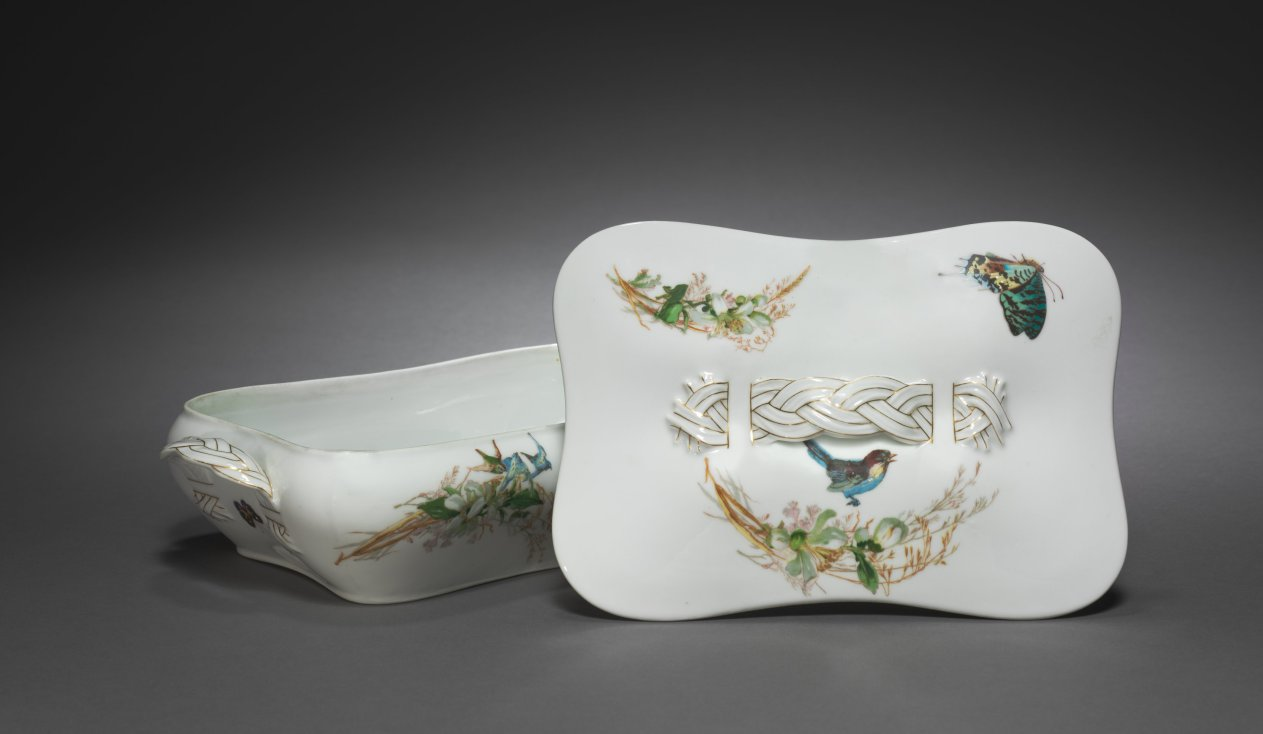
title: Covered Vegetable Bowl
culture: France, Limoges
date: c. 1890–1910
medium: porcelain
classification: Ceramic